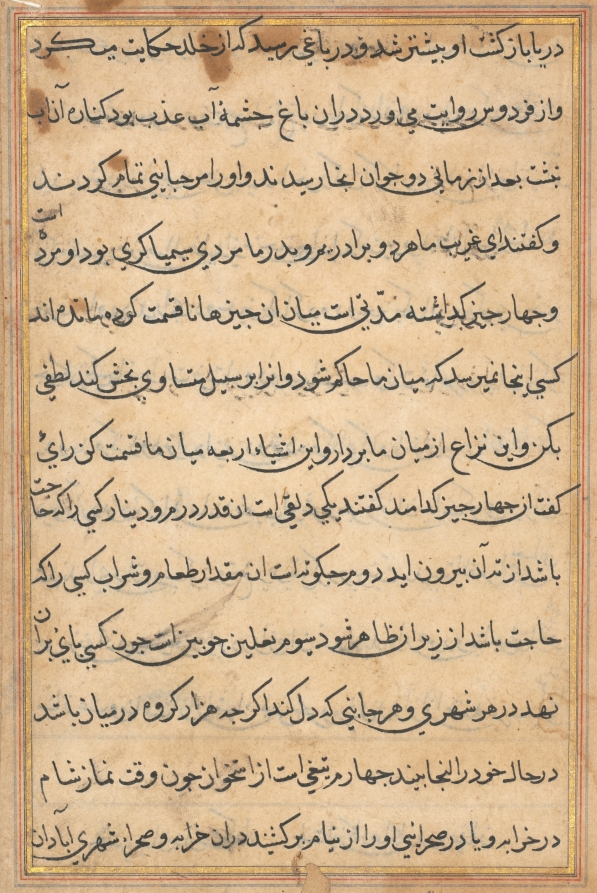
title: Page from Tales of a Parrot (Tuti-nama): text page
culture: Mughal India, court of Akbar (reigned 1556–1605)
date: c. 1560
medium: gum tempera, ink, and gold on paper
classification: Painting